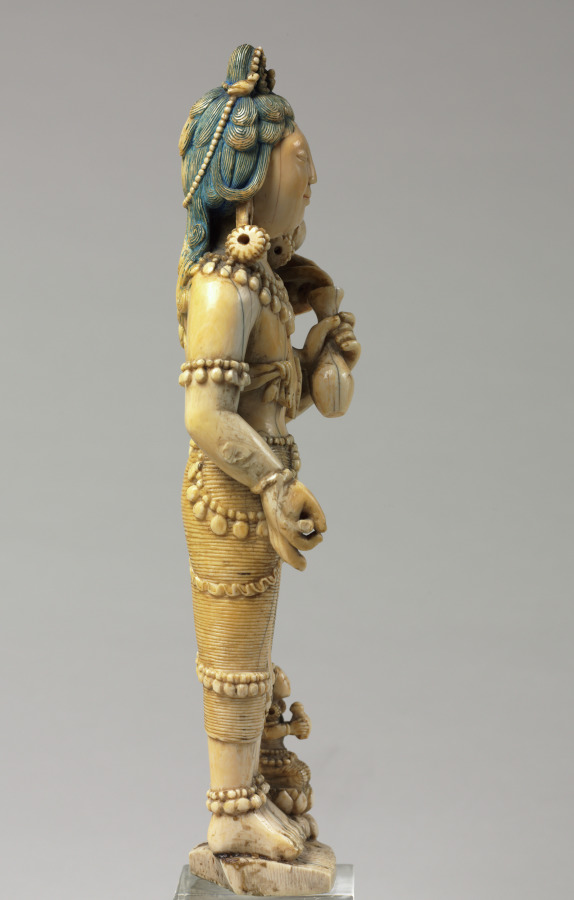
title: Bodhisattva of Compassion (Avalokiteshvara)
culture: Tibet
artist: Choying Dorje, the Tenth Black Hat Karmapa (Tibetan, 1604–1674)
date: 1647–48 or 1658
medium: ivory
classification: Ivory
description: Choying Dorje was one of the most influential monastic leaders in the history of Tibetan Buddhism. Known as the Tenth Karmapa, he was the head of the Karma Kagyu order of monks. His biographies state that from a young age he had a talent and passion for carving and painting images of bodhisattvas and other enlightened beings. Several of his original works survive, including this exceptionally rare ivory carving of Avalokiteshvara holding a lotus. Stylistically it is related to images from southwestern China, where he stayed in exile from 1647 to 1648 in the wake of Mongol invasions that destroyed many Kagyu monasteries in Tibet. While there he was exposed to Chinese art, which was favored by his patrons. The face has the distinctive elongation unique to Dorje's personal style. This sculpture could have been made during his time of exile or a decade later after his return to Tibet.